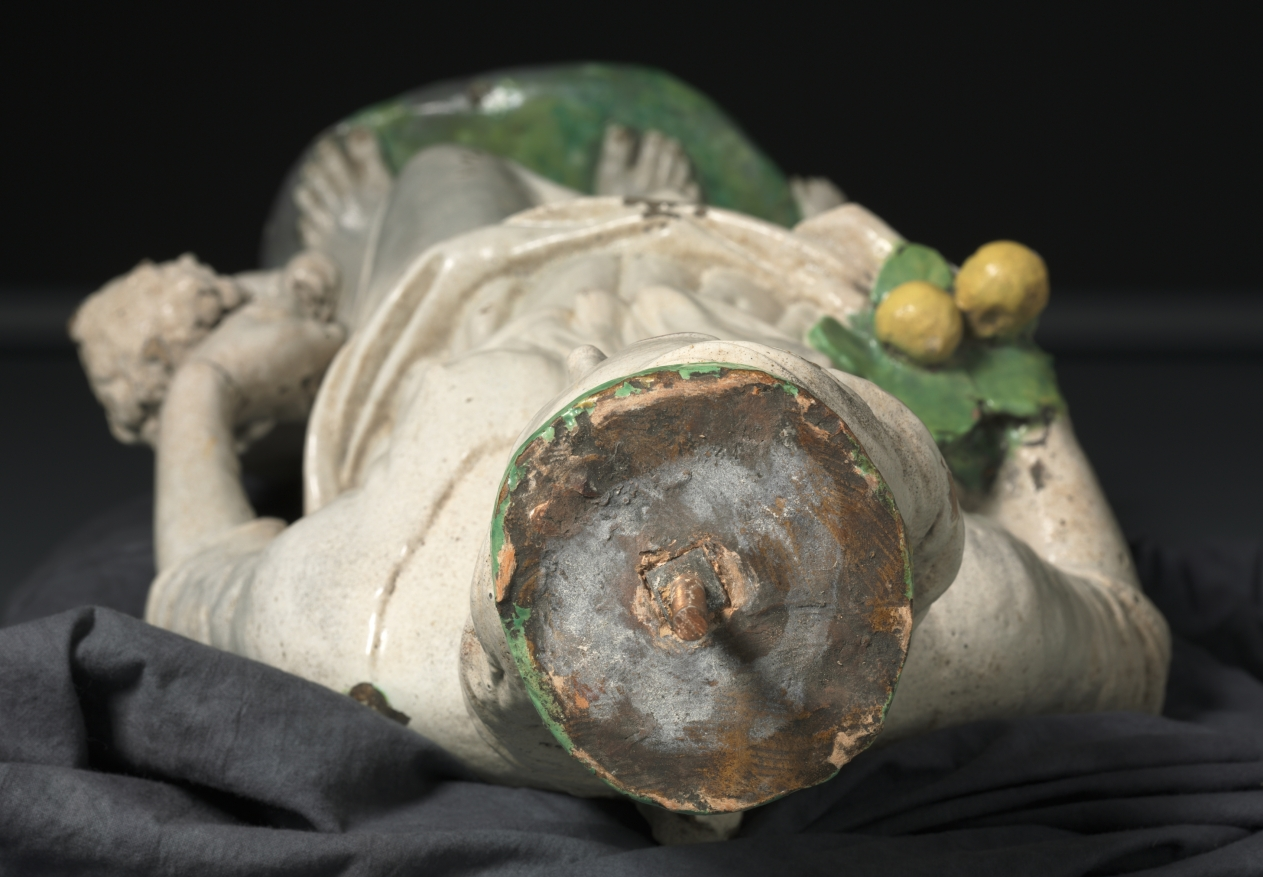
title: Dovizia (Plenty)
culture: Italy, Florence, 16th century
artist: Giovanni della Robbia (Italian, 1469–1529/30)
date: c. 1520–29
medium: glazed terracotta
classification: Sculpture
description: Many elite Florentine Renaissance homes had sculptures of idealized young women carrying nature’s bounty, such as this work. The motif stems from a statue by Donatello (about 1386–1466) that towered over Florence’s main public market. At home, however, the sculpture became a talisman for the family’s well-being. The city-state’s low birth rate was a serious political matter, and such a sculpture was believed to stimulate fertility while also promoting motherhood and bolstering financial success.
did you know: Inspired by an over life-sized, public sculpture by Donatello, Giovanni della Robbia reduced the figure for a domestic setting.